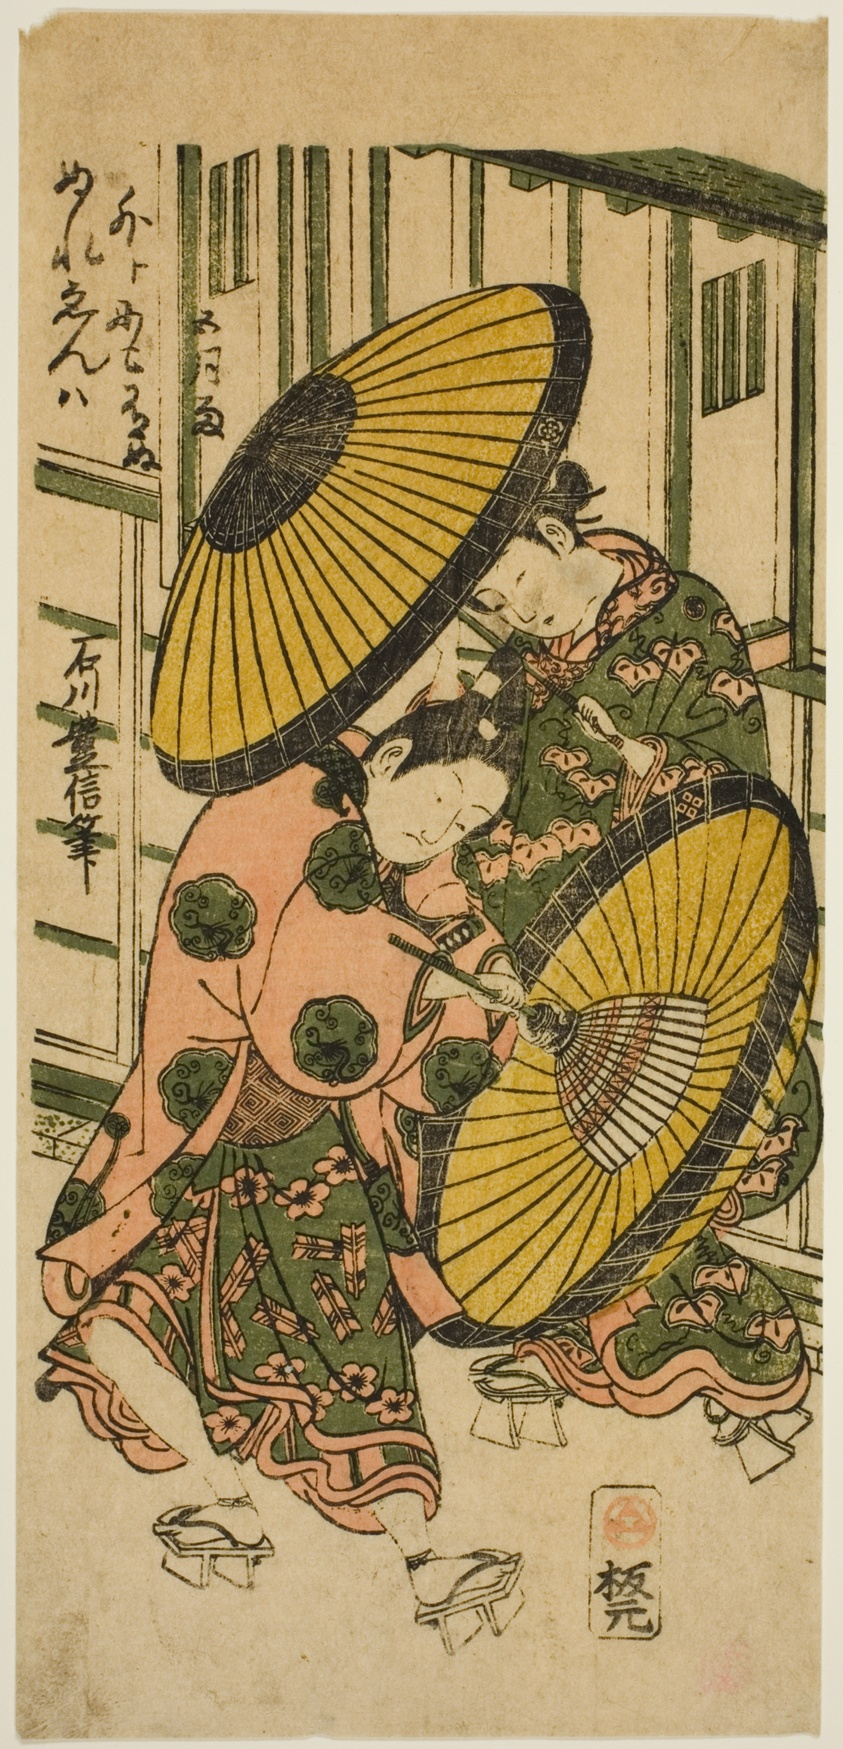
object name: Print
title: Rain in the Fifth Month (Samidare)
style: Japanese (culture or style)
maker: Ishikawa Toyonobu (Japanese, 1711-1785)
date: c. 1755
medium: Color woodblock print; hosoban, benizuri-e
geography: Japan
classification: woodblock print; print; asian art